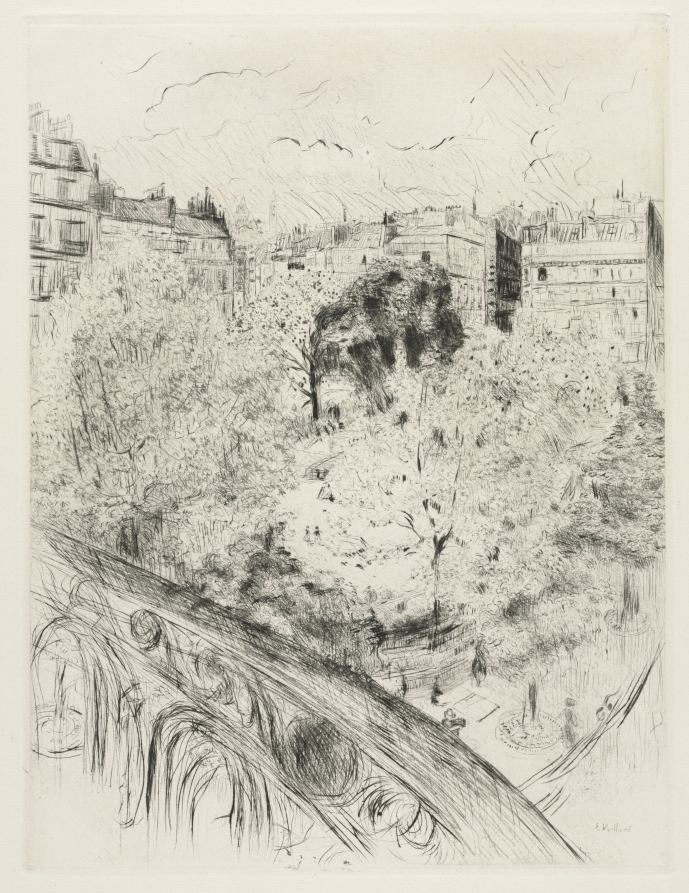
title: Square Vintimille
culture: France, 20th century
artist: Édouard Vuillard (French, 1868–1940)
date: 1937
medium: etching and drypoint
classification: Print